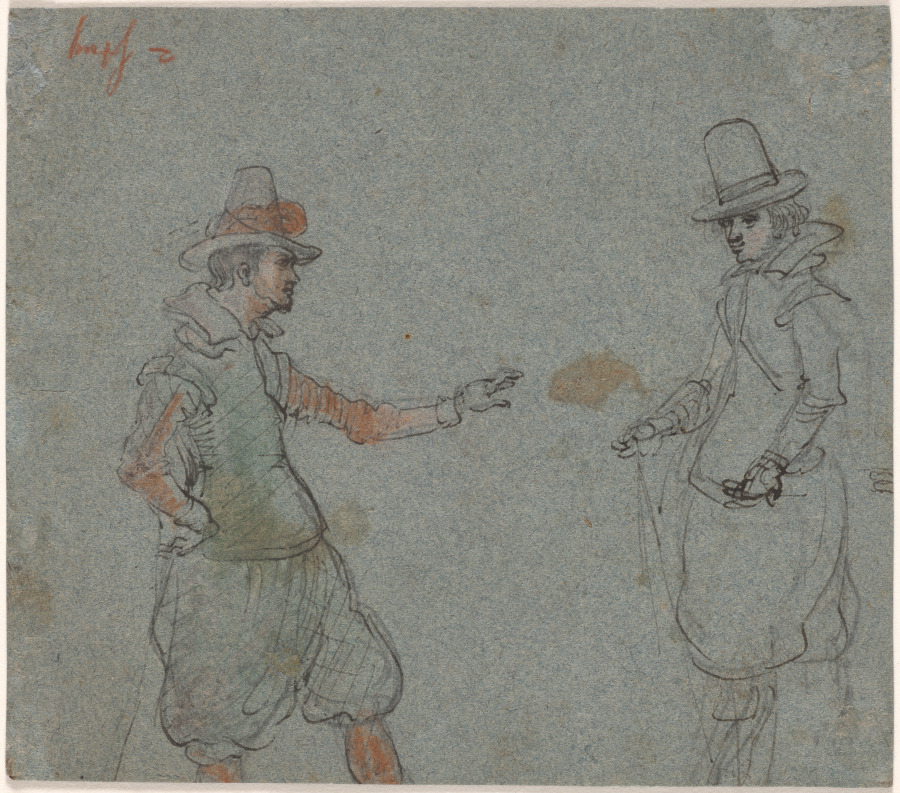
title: Two Gentlemen (verso)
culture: Netherlands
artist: Hendrick Avercamp (Netherlandish, 1585–1634)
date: c. 1618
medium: Pen and black ink, black and red chalk, graphite and watercolor on blue paper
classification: Drawing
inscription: Inscribed on the verso in red chalk: 2 Stuy [2 stuyvers]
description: Seventeenth-century Dutch artist Hendrick Avercamp became widely known for his near-exclusive production of winter landscapes, often featuring large crowds made up of different social classes congregated on the Netherlands’ iced canals and rivers and engaged in various activities from ice skating and socializing to doing laundry, fishing, and hauling goods. In this drawing, he sketched a woman squatting to do laundry at a hole in the ice, accompanied by a child who wipes tears from her eyes. On the verso (back) of the same sheet, two men in elegant, middle-class attire appear to be socializing. The artist kept such sheets in his workshop for reference in his larger, multi-figured, finished compositions.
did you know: Though incomplete due to the cut of the sheet, the gestures of the men on the back of this drawing suggest they could be engaged in a game of kolf, a ball and paddle game played on the ice that appears frequently in the artist’s winter scenes.